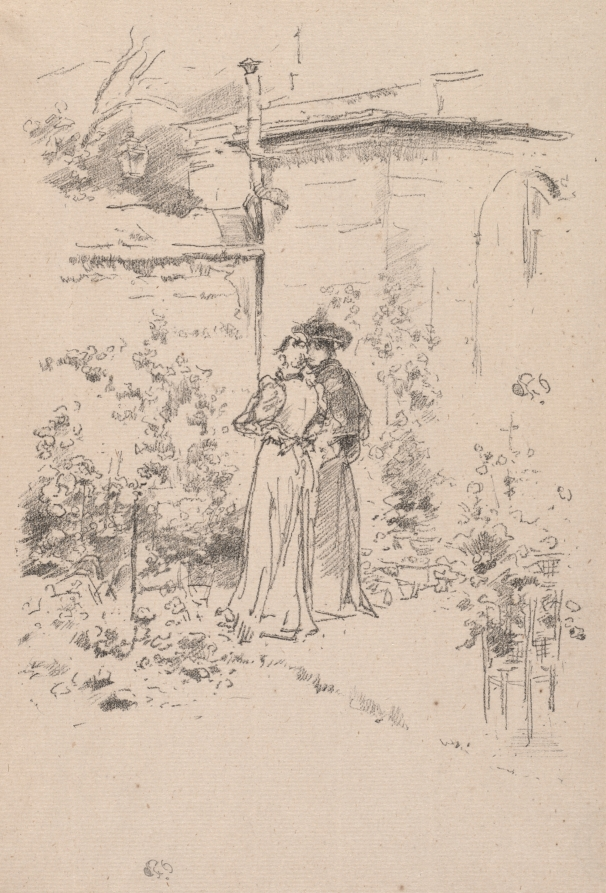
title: Confidence in the Garden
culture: America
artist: James McNeill Whistler (American, 1834–1903)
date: 1894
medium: lithograph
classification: Print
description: According to the artist's correspondence with the printerThomas Way, this image was initially called The Sisters,but Whistler decided to alter its title to Confidencesin the Garden. The lithograph shows his wife, BeatrixWhistler, and her sister, Ethel Birnie Philip, absorbedin conversation as they stroll through the Whistlers'lush, late-summer garden at 110 rue de Bac, Paris. The abbreviated suggestions of blossoms, climbing vines,and a grassy path are typical of the artist's late depictions of nature.